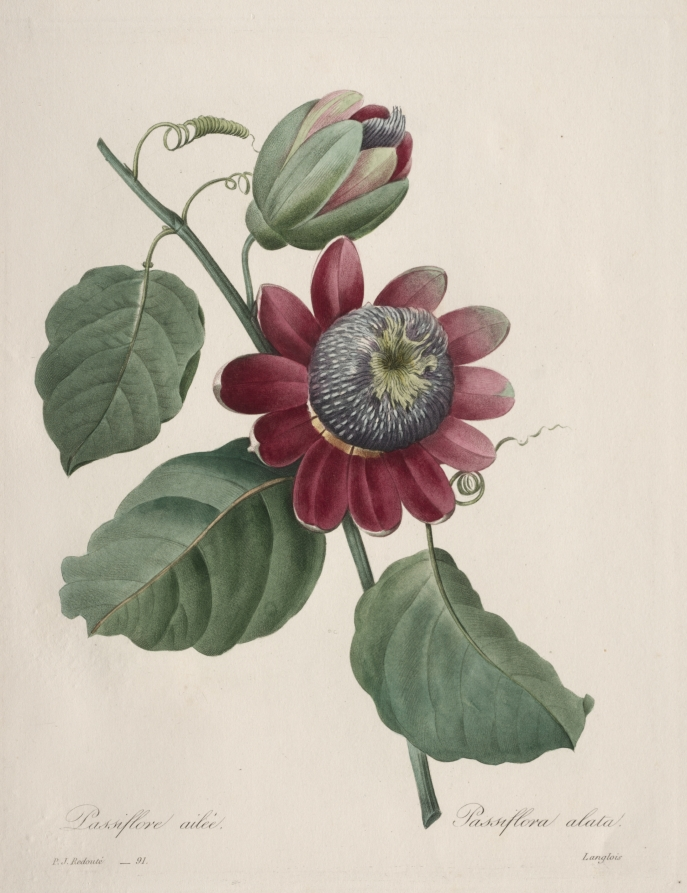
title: Choix des plus belles fleurs...plus beaux fruits: Passiflore ailee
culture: France, 19th century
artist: Henri Joseph Redouté (French, 1766–1853)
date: 1827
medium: stipple and line engraving, with hand coloring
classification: Print